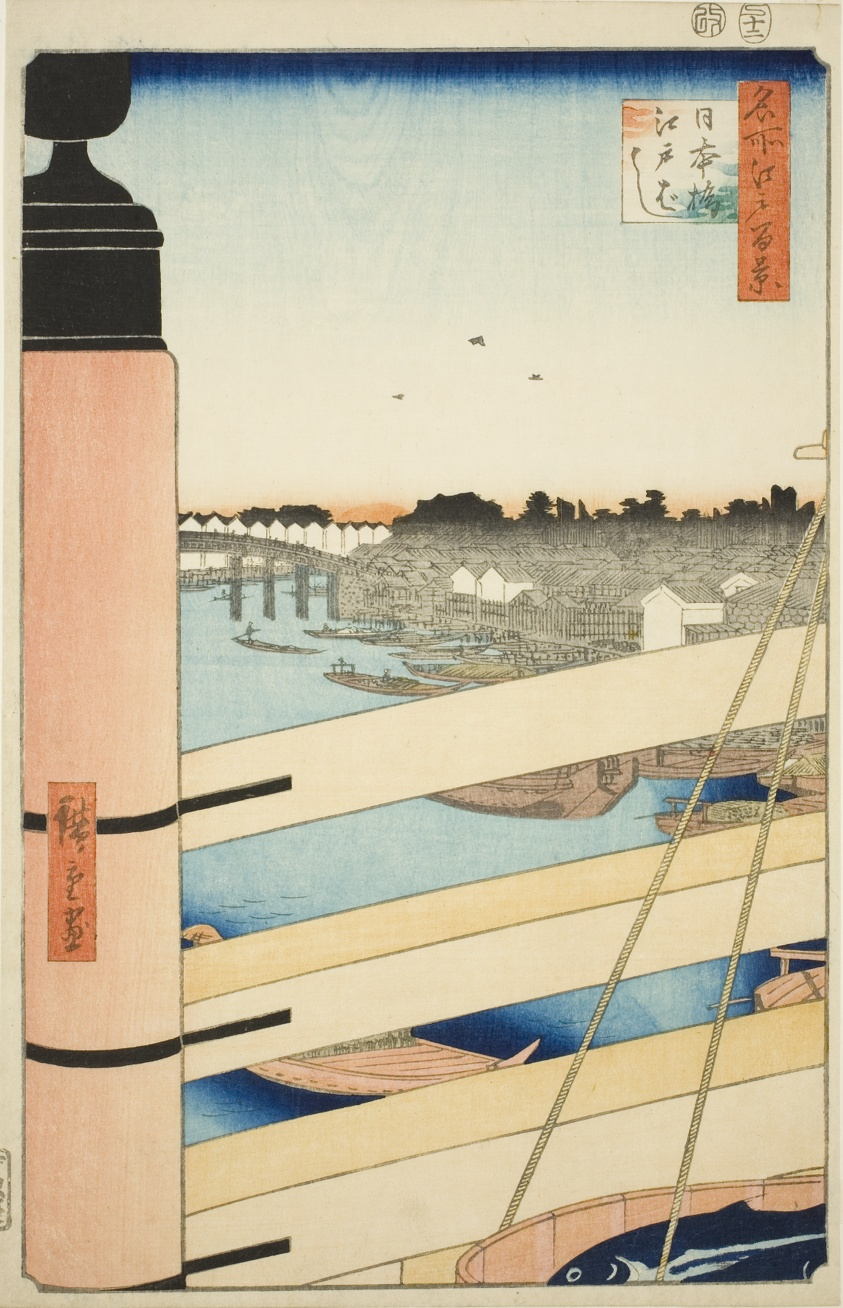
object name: Print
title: Nihon Bridge and Edo Bridge (Nihonbashi, Edobashi), from the series "One Hundred Famous Views of Edo (Meisho Edo hyakkei)"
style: Japanese (culture or style)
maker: Utagawa Hiroshige 歌川 広重; Japanese, 1797-1858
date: 1857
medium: Color woodblock print; oban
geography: Japan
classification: woodblock print; print; asian art